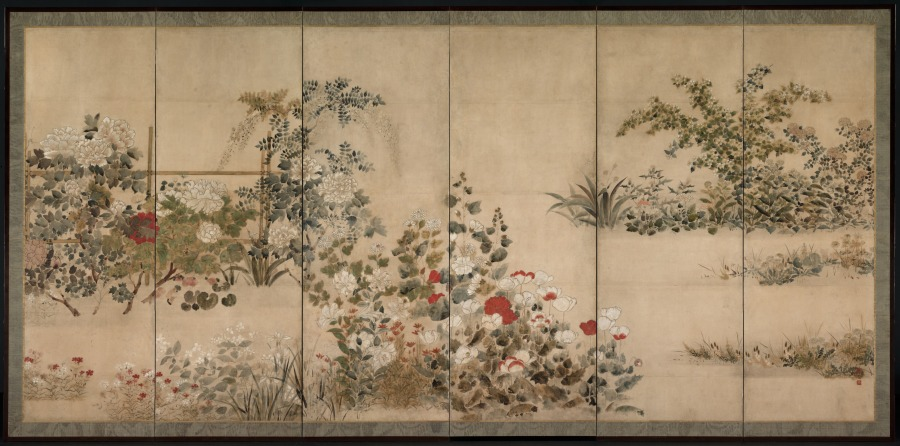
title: Flowers and Grasses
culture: Japan, Edo period (1615–1868)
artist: Kitagawa Sōsetsu (Japanese, active 1639–50)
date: mid-1600s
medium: One of a pair of six-panel folding screens; ink and color on paper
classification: Painting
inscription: two seals, lower right: "I-nen; Sosetsu"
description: Kitagawa Sōsetsu painted for the Maeda family, powerful rulers of what is present-day Ishikawa Prefecture on the central northern coast of Honshū, Japan’s main island. Screens served as room dividers and backdrops in Maeda grand residences. This composition is considered one of the artist’s masterpieces. Kitagawa Sōsetsu is thought to have been a student of Tawaraya Sōsetsu, who was in turn the student of Tawaraya Sōtatsu, the Kyoto-based master painter regarded as the creator of the style that came to be known as Rinpa. By selecting a painter of this lineage, the Maeda family consciously connected their aesthetics to those of the imperial capital as a means of proclaiming their elevated status.